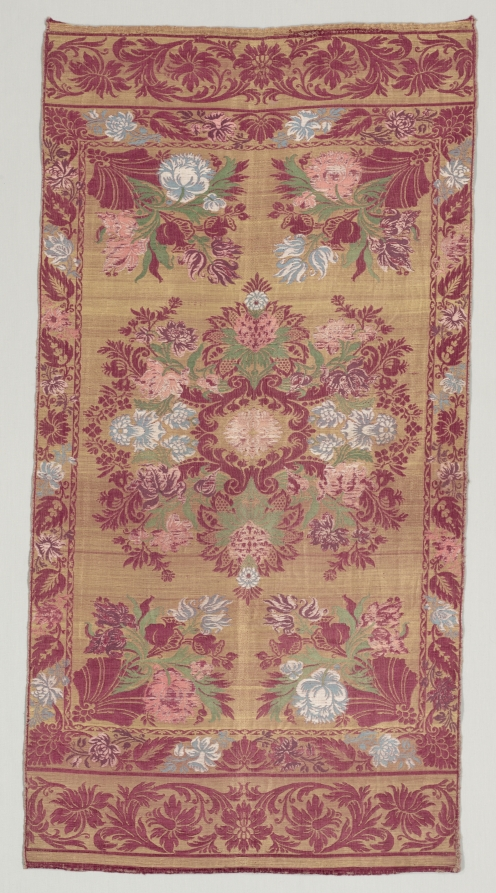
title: Cover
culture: Italy, 17th-18th century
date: 1600s - 1700s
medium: plain compound satin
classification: Textile